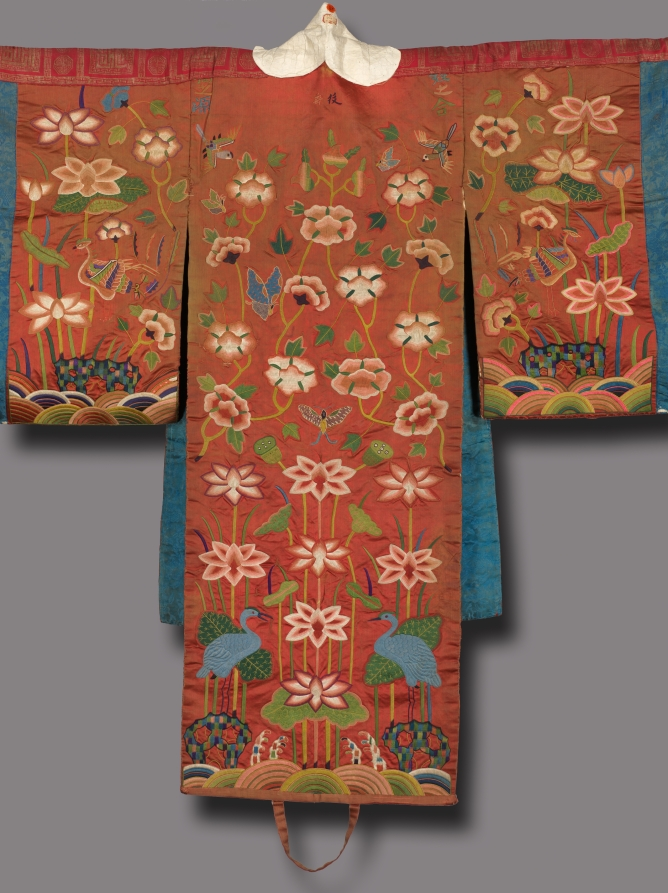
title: Bridal Robe (Hwarot)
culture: Korea, Joseon dynasty (1392–1910)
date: late 1800s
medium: Silk: satin weave; embroidery; paper edging on neck and sleeves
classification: Garment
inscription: 壽如河海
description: This bride's robe is exquisitely embroidered with various symbols of happiness in colorful silk threads. Butterflies stand for marital happiness; the phoenix, numerous offspring; and lotus flowers and white cranes, longevity. Yet, the bridal robe does not attest to the life of luxury. To the contrary, many traces of repairs, trimmings, and patchwork, reflect Joseon period women’s commitment to value neo-Confucian aesthetics of frugality and modesty. Substantial repairs and patching reveal that this robe served as an important communal resource to be shared and passed down through several generations. Its collar and sleeves are covered in thick white paper; this paper is replaced with new paper for each bride, while the robe itself was reused for decades.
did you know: This bride's robe is made of densely embroidered silk, but its collar and sleeves are covered in thick paper.